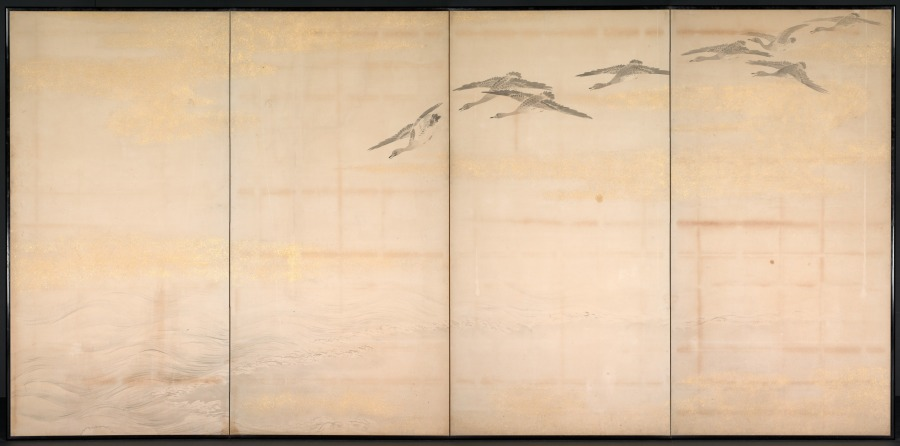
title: Geese, Reeds and Water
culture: Japan, Edo period (1615–1868)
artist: Yamamoto Baiitsu (Japanese, 1783–1856)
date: 1800s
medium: One of a pair of four-panel folding screens; ink, color, and cut gold foil on paper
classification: Painting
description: This byōbu composition differs from most in that it comprises two four-panel screens, rather than two six-panel units. Since the current mounting is modern, it is impossible to determine whether its present configuration represents its original design. Some panels may have been removed to help the screens better fit into a modern interior space. Baiitsu worked almost exclusively in monochromatic ink tones and favored classical Chinese painting themes.